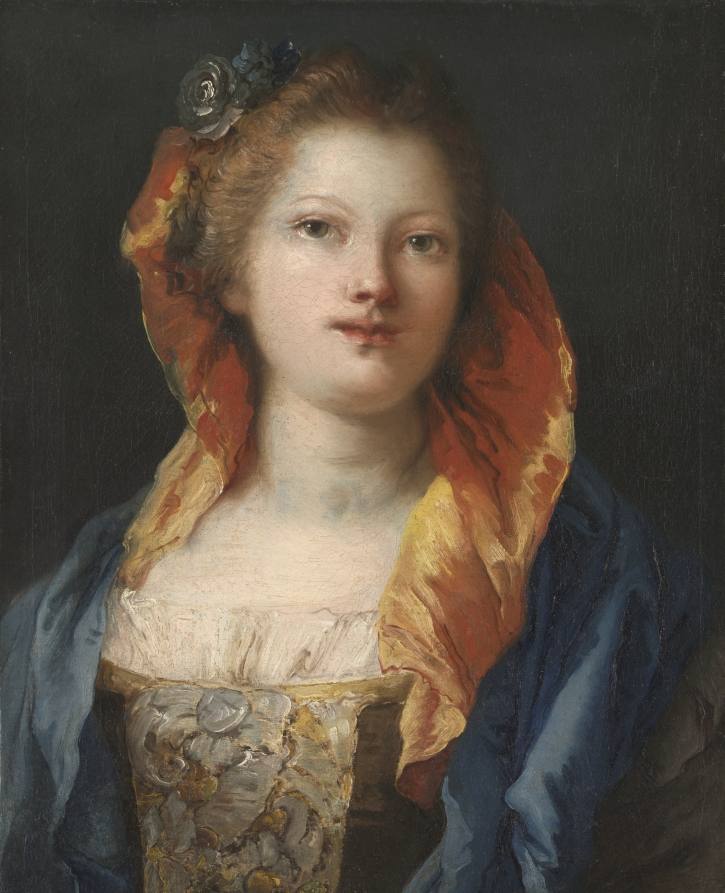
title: Portrait of a Woman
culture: Italy, 18th century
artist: Giovanni Domenico Tiepolo (Italian, 1727–1804)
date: 1762–1770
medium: oil on canvas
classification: Painting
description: This portrait was made in Spain, where the artist (the son of Giambattista Tiepolo, the great Venetian fresco painter) lived between 1762 and 1770.